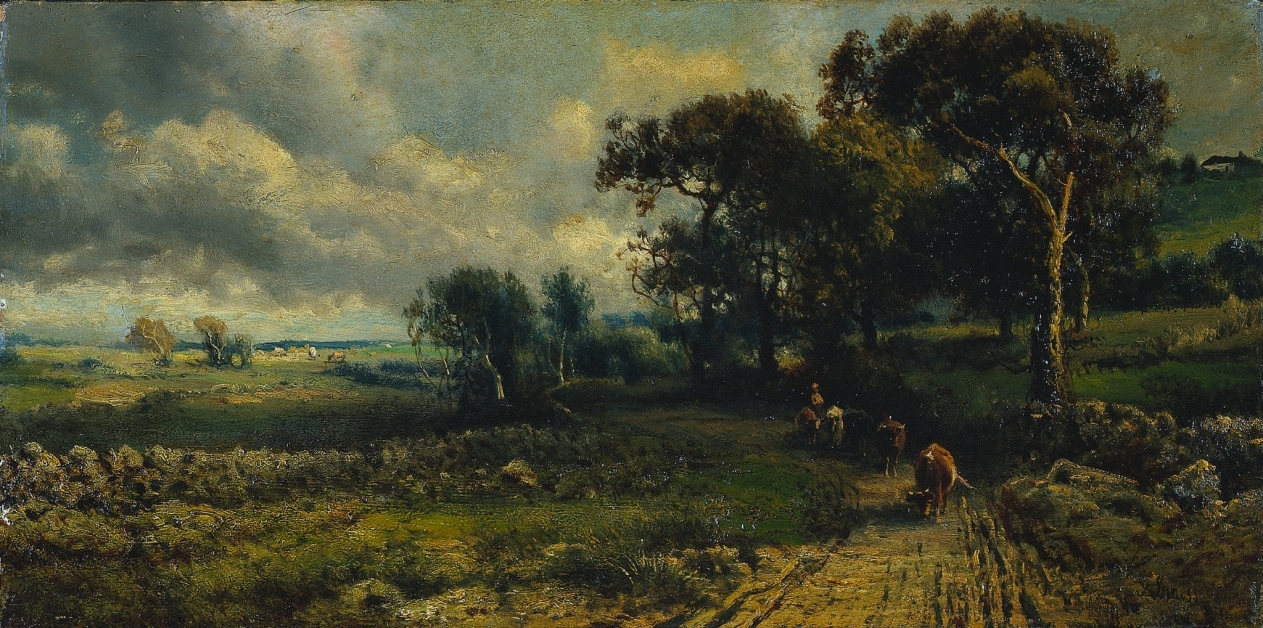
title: Fleecy Clouds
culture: America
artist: imitator of George Inness (American, 1825–1894)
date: 1881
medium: oil on canvas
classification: Painting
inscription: Signed lower right: "G. Inness / 81"